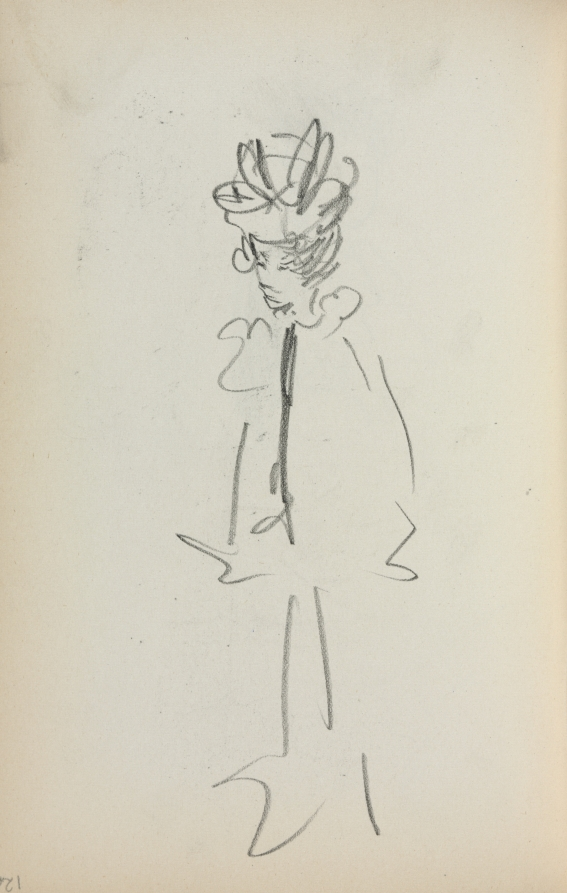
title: Italian Sketchbook: Standing Woman 3/4 View (page 126)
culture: America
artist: Maurice Prendergast (American, born Newfoundland [now Canada], 1858–1924)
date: 1898–1899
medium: pencil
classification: Bound Volume